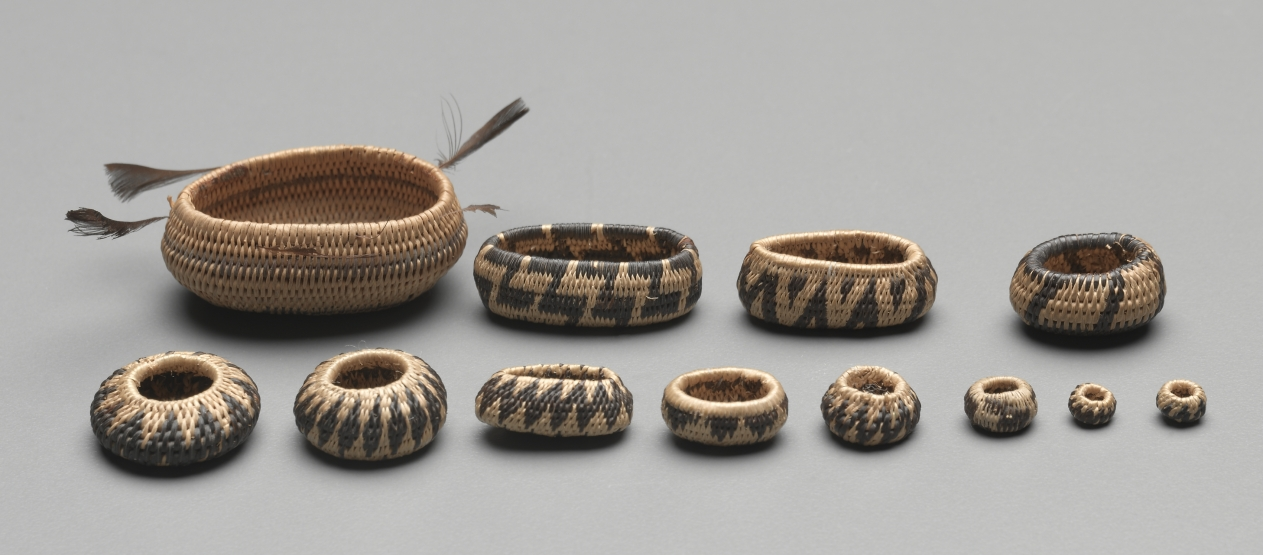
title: Miniature Round Basket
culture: California, Pomo, late 19th-early 20th century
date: late 1800s-early 1900s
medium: plant materials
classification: Basketry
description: Miniature baskets were made to demonstrate the basket-maker’s virtuoso skill, and these tiny marvels seem to be no exception—the smallest are only five millimeters wide but still patterned. For such fine work, dexterity was required as much for preparation of materials as for weaving.